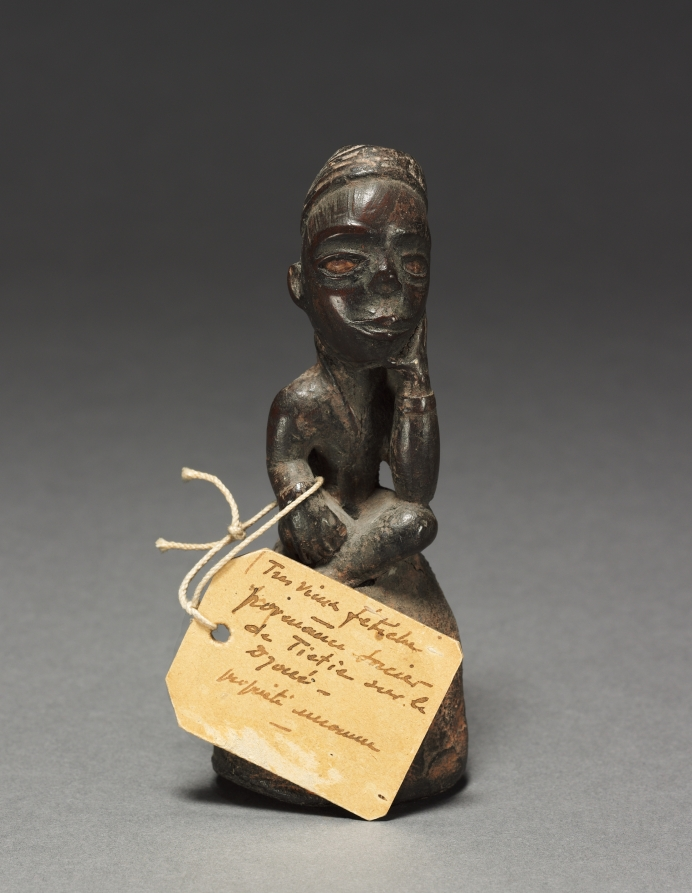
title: Power figure (nkisi)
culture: Africa, Central Africa, Republic of the Congo, Kongo-style maker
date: late 1800s-early 1900s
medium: Wood, organic materials (including resin), cloth, glass, and various other materials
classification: Sculpture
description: One of seven anthropomorphic figurines, these minkisi contained medicines in which an ancestral spirit was believed to reside. The medicines served a metaphorical rather than literal purpose in the resolution of conflicts among Kongo people. This asymmetrical figure wears a mpu headdress of chiefs with its characteristic geometric decoration. The pose may refer to a state of mourning.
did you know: Different from other Minkisi who hold their power in their abdomen, this figure sits atop a sphere in which the active substances still reside.